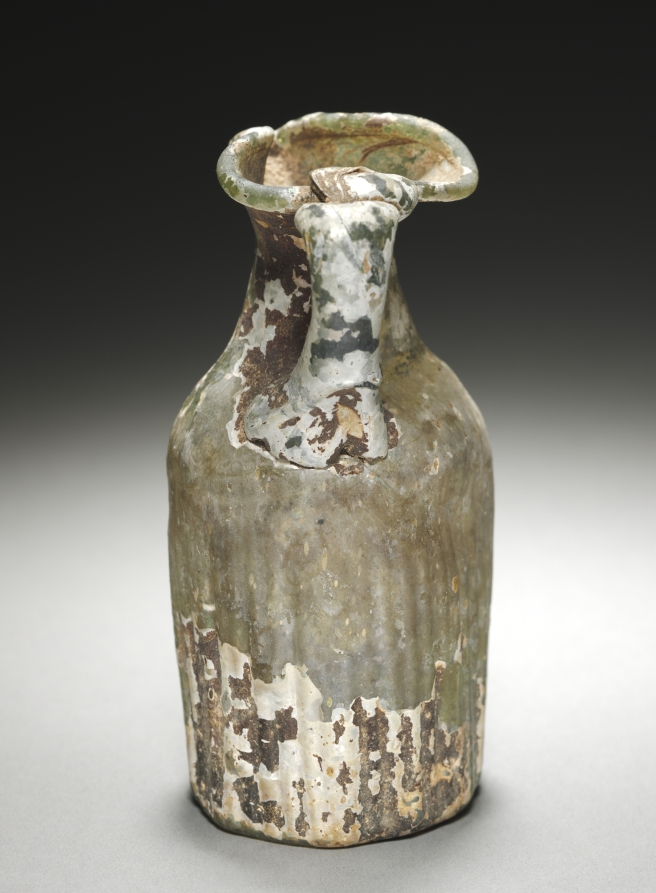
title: Jug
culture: Syro-Palestinian, Roman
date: 300s CE or later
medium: glass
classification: Glass